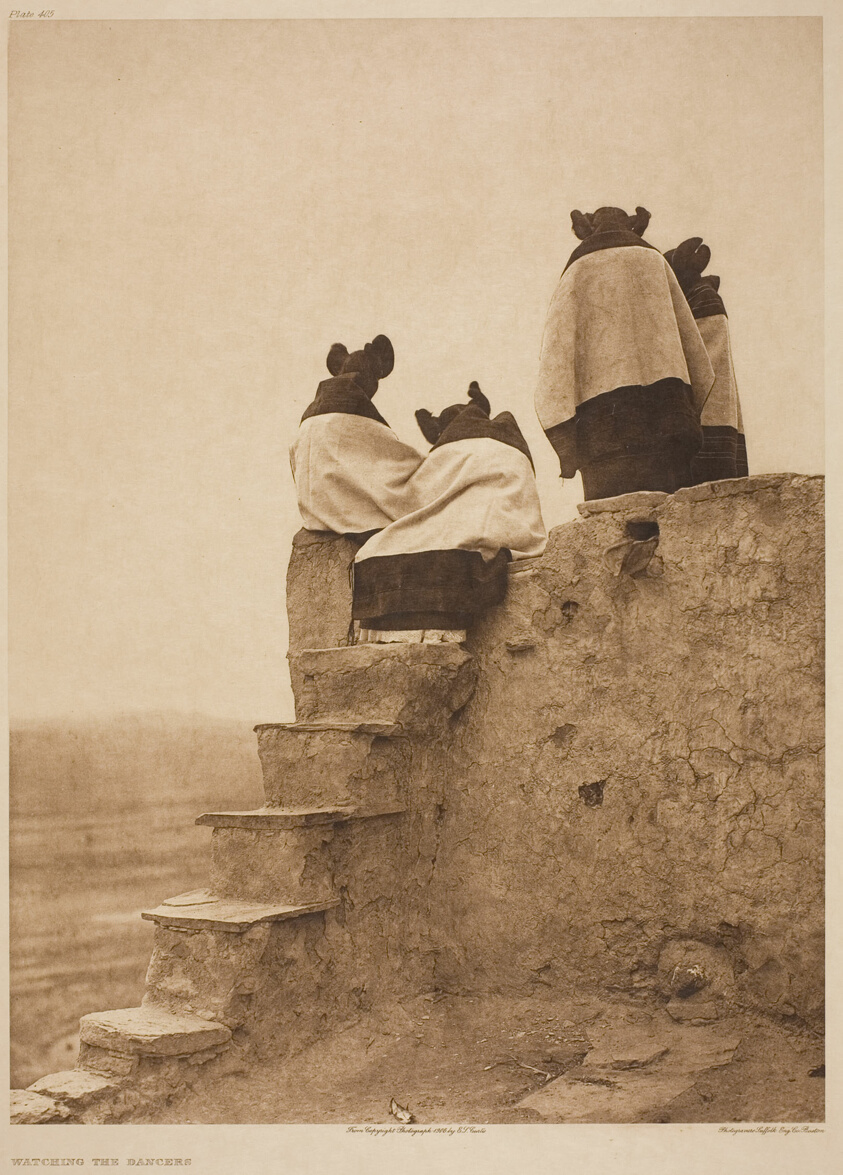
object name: Photograph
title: Watching the Dancers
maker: Edward S. Curtis (American, 1868–1952)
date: 1906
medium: Photogravure, plate 405 from "The North American Indian, Volume 12" (1922)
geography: United States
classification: photogravure; photomechanical process; photography; photograph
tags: portraits, portraits: Native American subject, photography